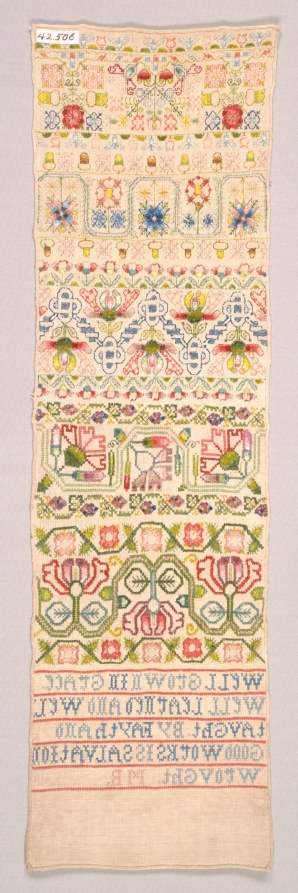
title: Long Sampler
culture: England, 17th century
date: c. 1650–70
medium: embroidery: silk on linen tabby ground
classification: Sampler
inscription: below: "WELL GROWN IN GRACE/ WELL LEARNED AND WELL/ TAUGHT BY FAYTH AND/ GOOD WORKS IS SALVATION/ WROUGHT. M B."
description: Samplers were created as a mark of achievement in needlework by young ladies as they progressed in their education. Because they display levels of skill and technique, samplers often include figurative or scenic decoration along with the alphabet and various horizontal and vertical patterns that could serve as guides for future stitching. Most samplers reveal the pride of a young lady as she showed off her considerable accomplishment in sewing and were treasured from generation to generation.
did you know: Long samplers from England in the 1600s often reproduced or adapted designs from earlier pattern books for needlework.